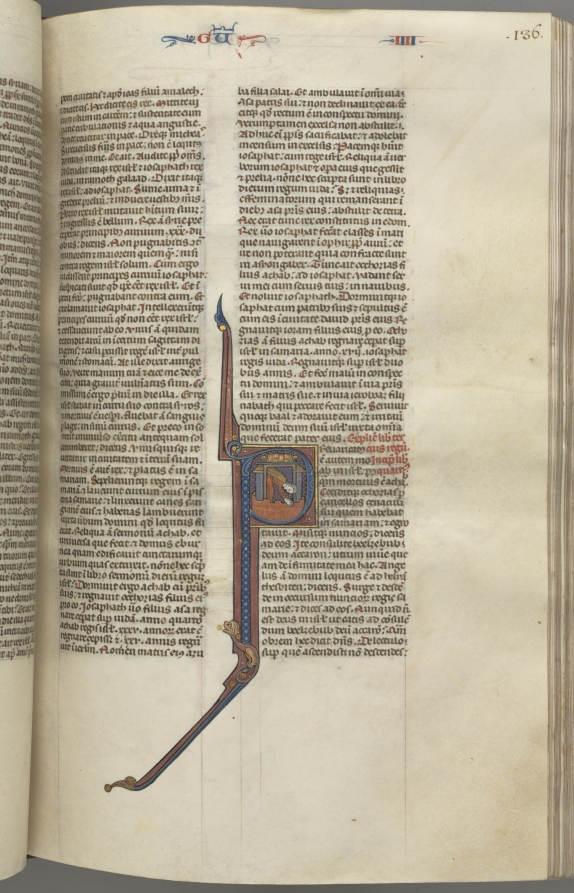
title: Fol. 136r, Kings IV, historiated initial P, Ahaziah falling from a tower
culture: Southern France, Toulouse(?), 13th century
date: c. 1275–1300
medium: ink, tempera and gold on vellum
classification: Bound Volume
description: Biblical manuscripts were highly prized and important possessions of churches, monasteries, cathedral schools, and universities throughout medieval Europe. The biblical texts were known as the vulgate, the translations made by Saint Jerome in the fourth century from Hebrew and Greek into Latin, which became the definitive and official Latin version of the Roman Church. In the 13th century, the bible was, for the first time, produced as a single volume with an officially sanctioned sequence to its books and chapters as illustrated by this example. The very extensive decoration of this bible is arranged hierarchically to indicate the relative importance of the various texts so that full or almost full-page initials mark the openings of the first prologue, Genesis, and the first Gospel; historiated initials mark the beginning of each book and illuminated initials mark the Prologues.